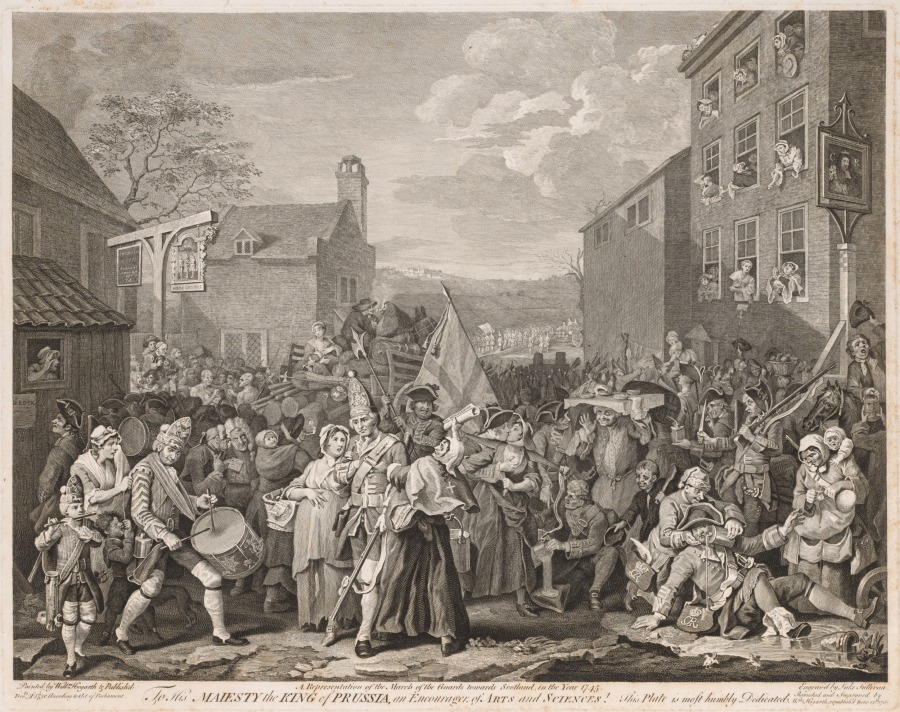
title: March to Finchley in the Year 1746 (After Hogarth)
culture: England, 18th century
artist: Luke Sullivan (British, 1705–1771)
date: 1750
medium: etching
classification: Print